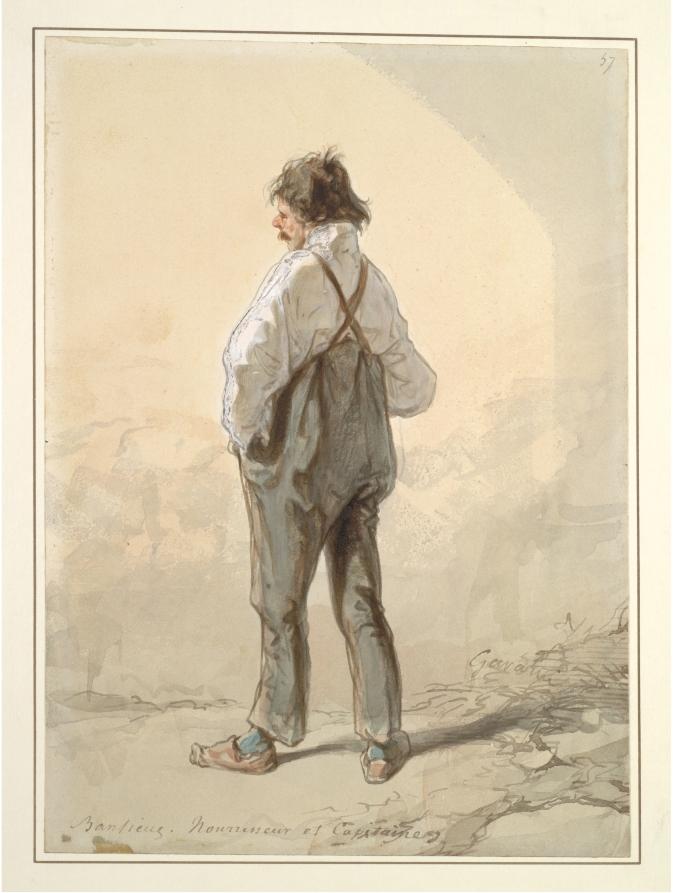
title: The Suburbs: Stock Raiser and Captain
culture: France, 19th century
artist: Paul Gavarni (French, 1804–1866)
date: probably 1859–1860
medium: watercolor (mixed with white gouache in places) over graphite, heightened with white gouache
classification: Drawing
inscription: signed, lower right, in gray wash: Gavarni; by artist, lower left, in gray wash: Banlieue. Nourrisseur et Capitaine; upper right, in graphite: [5?]7; verso, lower right, in graphite: ntb 2; lower right, in red crayon: No 81 [upside down, underlined]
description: The subject here-a man who raises livestock and happens to be a captain as well-is one in a long line of Parisian characters that Gavarni chronicled in his career. This sheet once belonged to the collection of the artist's watercolors made for the important Parisian publisher Pierre-Jules Hetzel. Composed of about 200 sheets executed mostly in 1859-60, Hetzel's collection was a rare ensemble of the artist's best work in the medium.